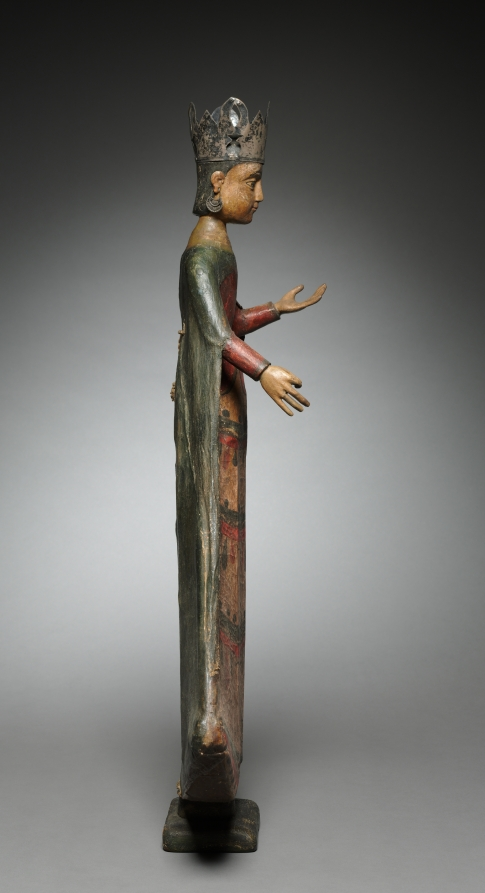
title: Santos: Virgin Crowned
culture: America, New Mexico, 19th century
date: 1800s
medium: painted wood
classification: Sculpture